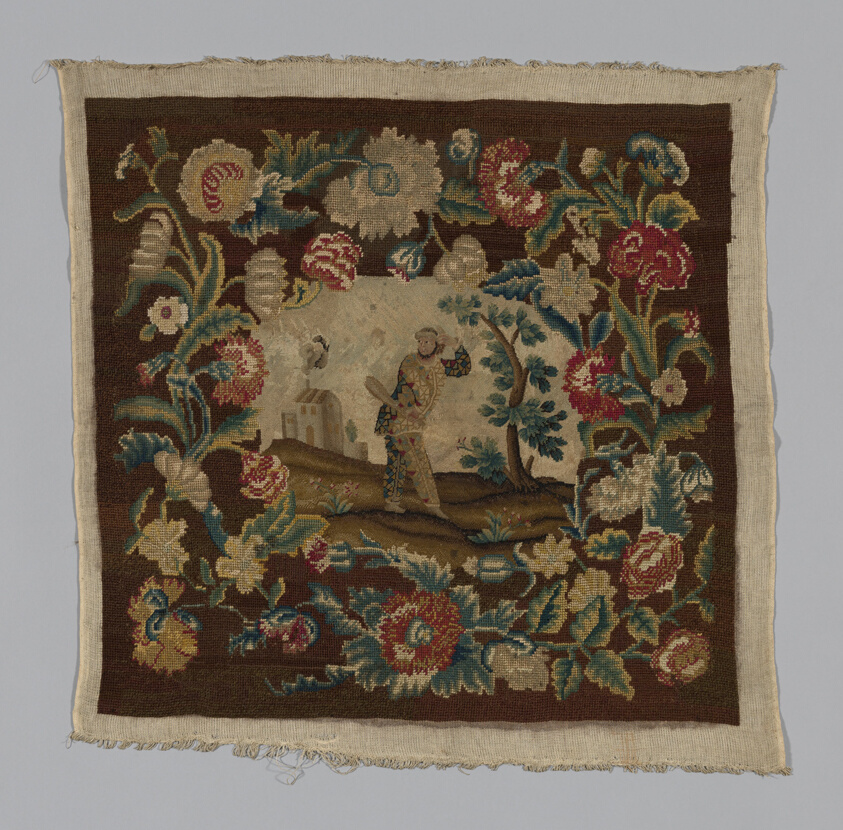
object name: Textile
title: Chair Seat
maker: France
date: 18th century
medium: Linen, plain weave; embroidered with wool and silk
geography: France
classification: textile; needlework (visual works)